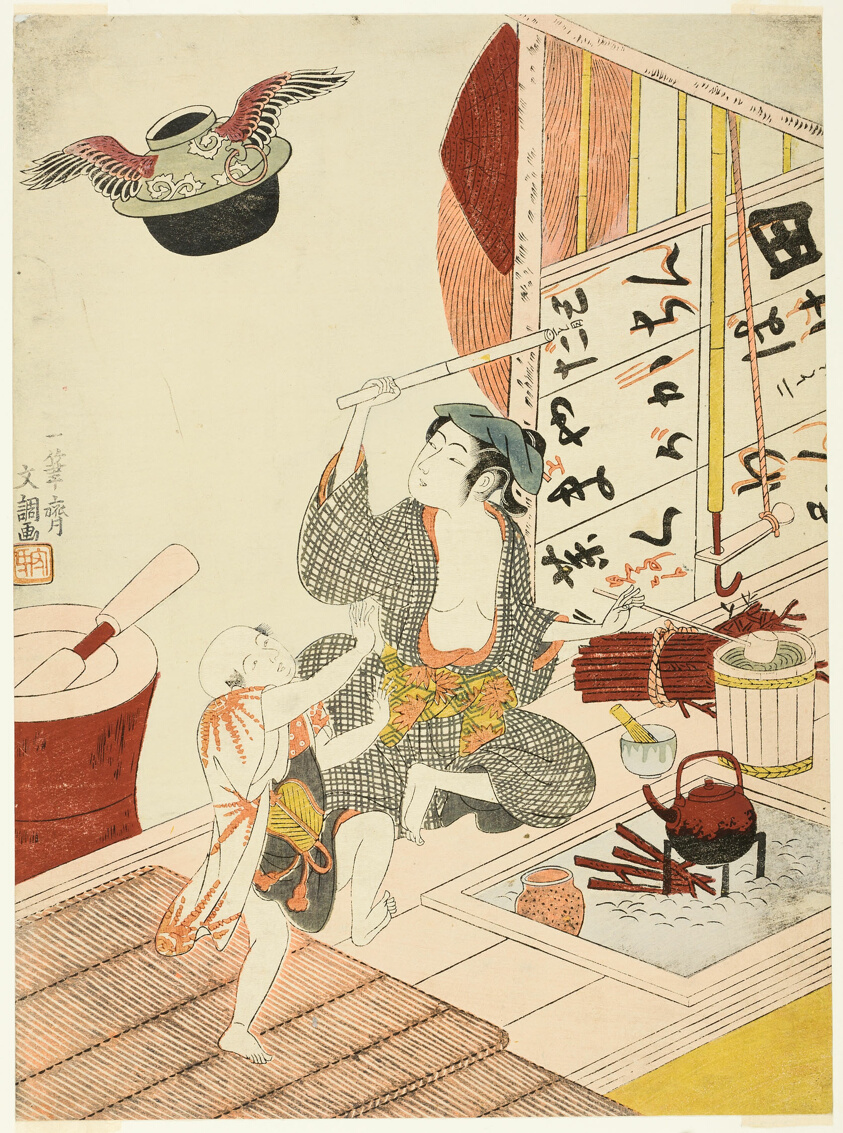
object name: Print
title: The Flying Tea Ceremony Kettle (Tonda Chagama)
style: Japanese (culture or style)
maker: Ippitsusai Buncho (Japanese, active c. 1755-90)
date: c. 1770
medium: Color woodblock print; chuban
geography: Japan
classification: woodblock print; print; asian art